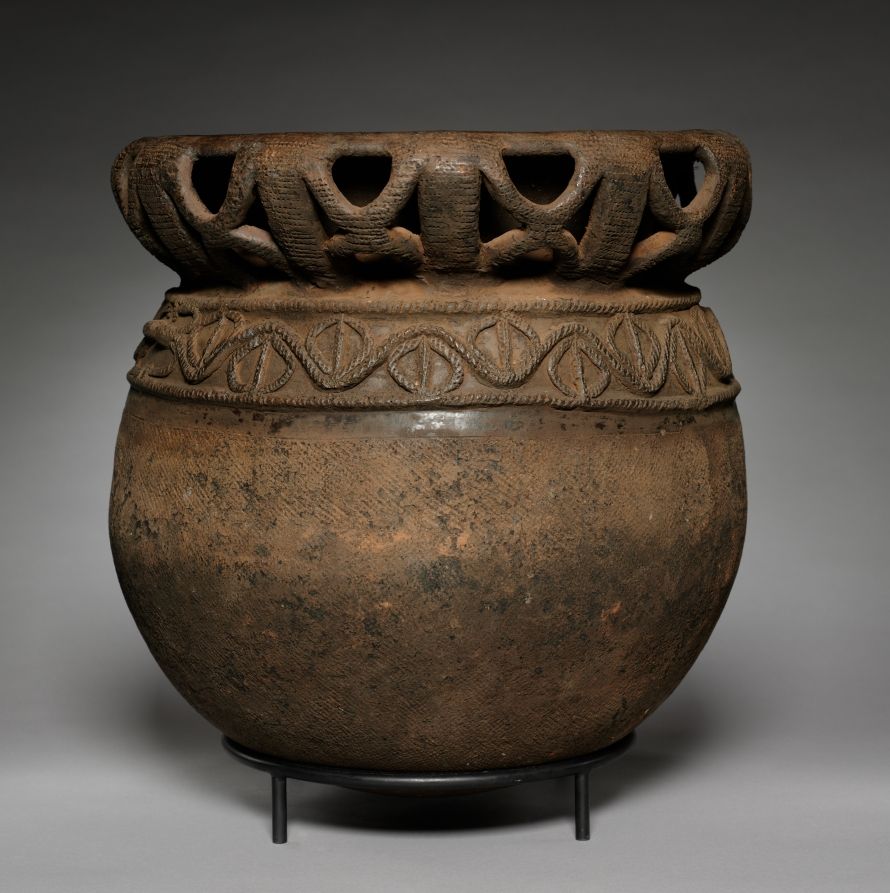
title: Palm Wine Vessel (kuh mendu)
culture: Probably Babessi or Bamessing, Cameroon, Cameroon Grassfields-style pottery, unknown female ceramicist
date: 1900s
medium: Terracotta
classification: Vessels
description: Made by a female potter nearly a century ago, this palm wine vessel represents past and present cultural practices in the Cameroon Grassfields (northwest and western Cameroon). Women in the pottery-producing centers of Babessi and Bamessing hand-built these vessels. Their process alludes to pregnancy, labor, and delivery. Passing knowledge from mother to daughter since at least the 1700s, making pottery is a female economic, social, and artistic contribution. Yet many motifs refer to royal or male power, such as the lizards on this vessel. Elegant palm wine vessels like this were appropriate for ritual and hospitality in Cameroon Grassfields royal courts.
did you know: Serving and sharing palm wine in decorated vessels like this is part of a larger food culture in the Cameroon Grassfields kingdoms that centers on ritual, hospitality, status, and diplomacy.